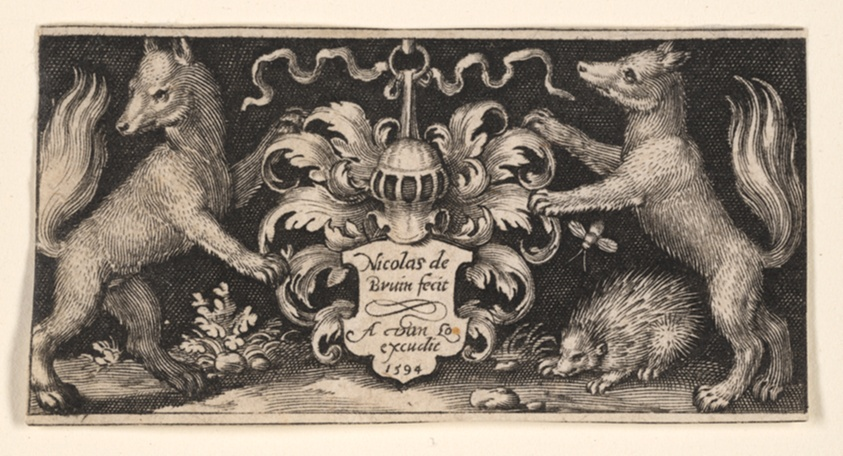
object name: Print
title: Title Plate with Two Foxes, from Fighting Chimeras and Scenes from Aesop's Fables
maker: Nicolaes de Bruyn (Flemish, 1571–1656)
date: 1594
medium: Engraving on paper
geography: Flanders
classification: engraving; paper; print; prints and drawing